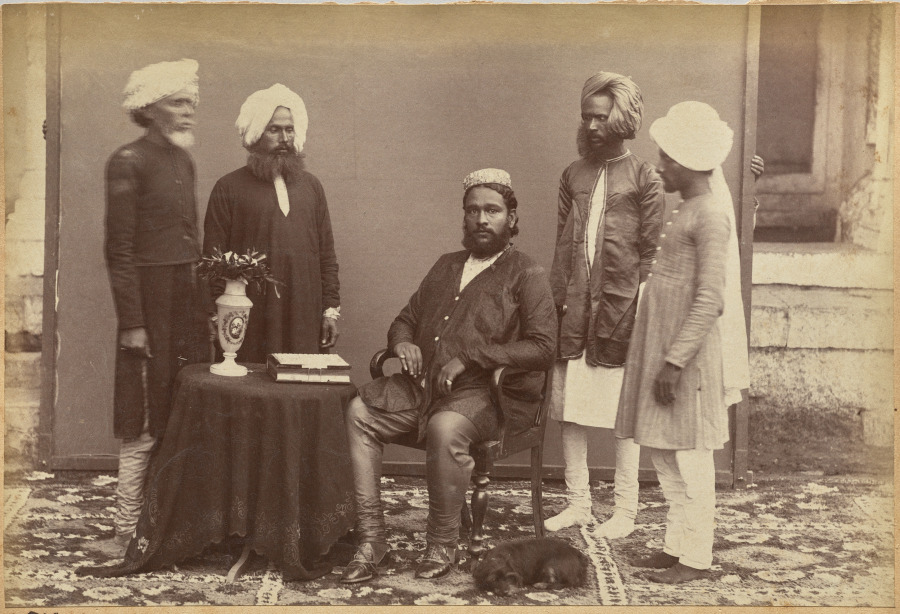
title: Ramkishore Singh, Rewa (recto, top)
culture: India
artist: Raja Deen Dayal (Indian, 1844–1905)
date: c. 1882–87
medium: albumen print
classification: Photograph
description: These photographs are part of an album, now disassembled, of around 105 photographs taken in India between 1885 and summer 1887 that provide glimpses into the lives of the British colonial elite and royal and upper-class Indians. The museum holds another group of 37 pictures from this album (2016.266), which was probably commissioned by a British civil servant visiting or working in India around 1888 as a personal souvenir of his experiences there.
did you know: Raja Deen Dayal is regarded now, and was considered during his lifetime, to be India’s most important 19th-century photographer.